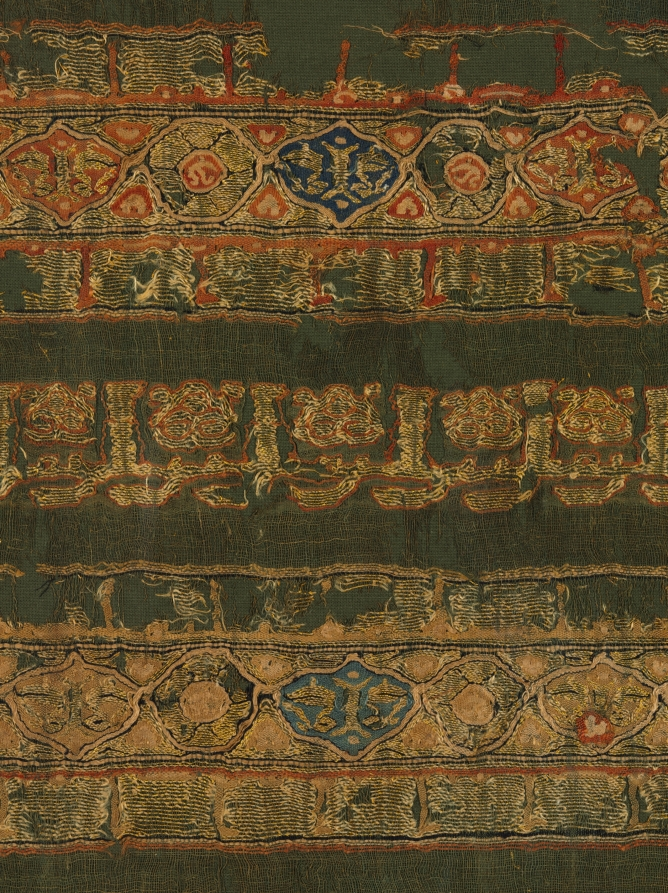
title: Tiraz with gold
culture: Egypt, Fatimid period, reign of Caliph al-Musta‘lī, 1094–1101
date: 1094–1101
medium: plain weave with inwoven tapestry weave: linen, silk, and gold filé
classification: Textile